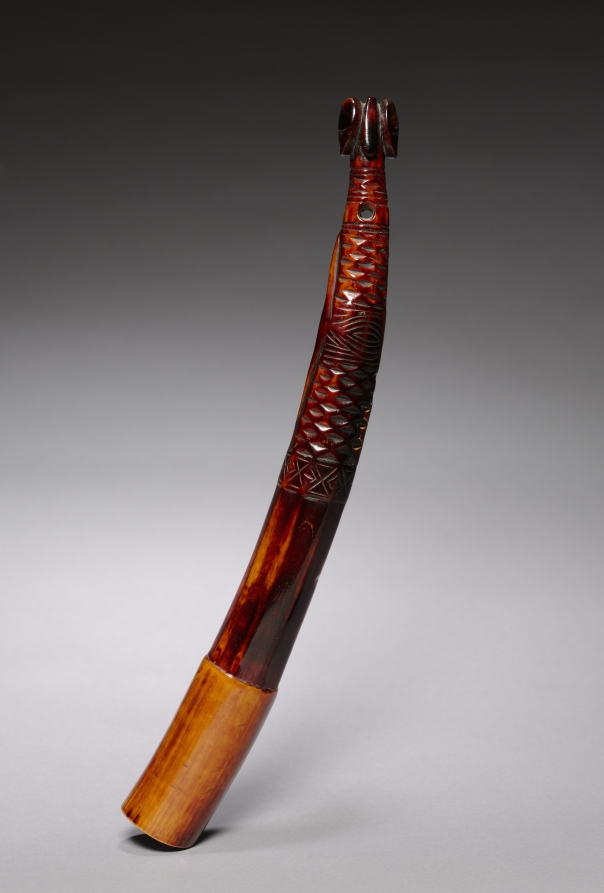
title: Side-Blown Trumpet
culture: Equatorial Africa, Cameroon; Fang, 19th century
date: late 1800s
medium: Elephant ivory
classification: Musical Instrument